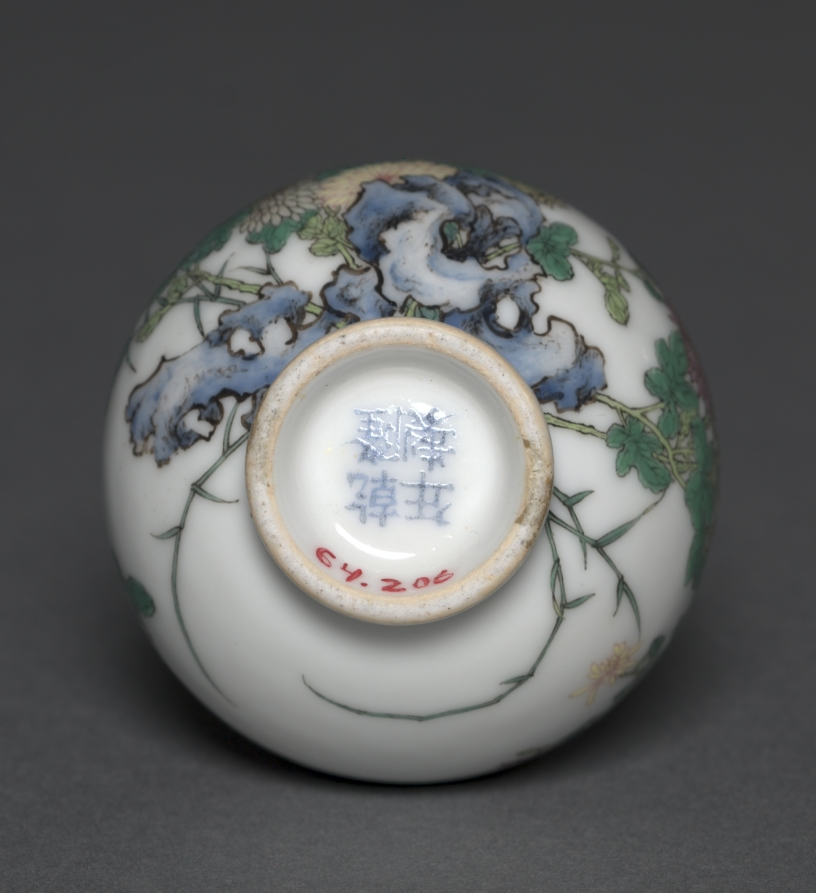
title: Miniature Vase with Birds and Chrysanthemums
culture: China, Jiangxi province, Jingdezhen kilns, Qing dynasty (1644-1911), Qianlong mark and reign (1736-95)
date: 1736–95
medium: porcelain with famille rose overglaze enamel decoration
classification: Ceramic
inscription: 乾隆年製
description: In the Qing dynasty (1644–1911), imperial patronage and a growing urban population encouraged consumption of luxury goods and local craftmanship. Luxury items became more affordable to larger parts of the society, including women, merchants, and literati in nonofficial positions. This miniature porcelain vase with famille rose overglaze enamel decoration illustrates some of the highest technical accomplishments in Qing porcelain production.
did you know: Green, pink, lavender, light lemon yellow, blue, and brown enamels were skillfully applied to this miniature vase.